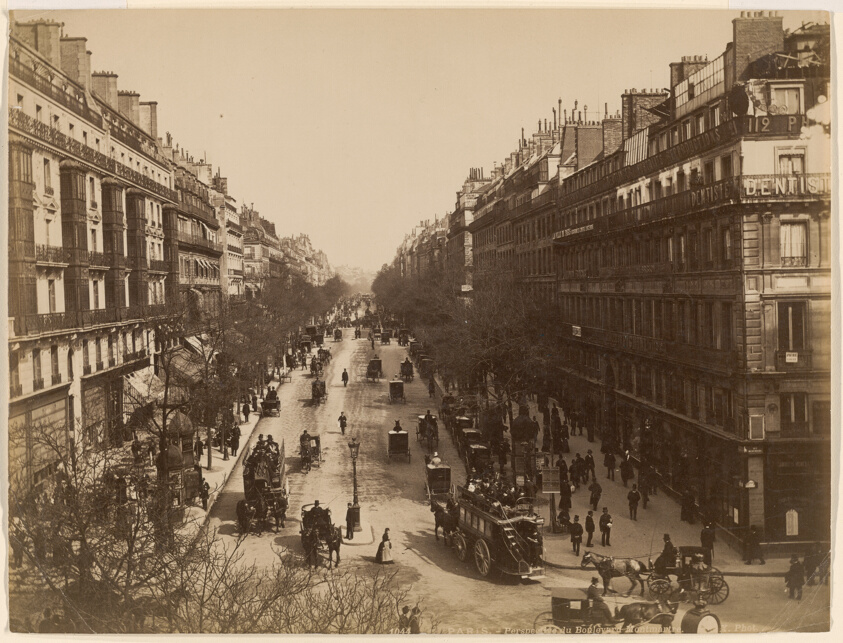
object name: Photograph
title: Montmartre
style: 19th century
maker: Artist unknown; European, active 19th century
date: 1870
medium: Albumen print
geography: Europe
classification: albumen silver print; photographic process; photography; photograph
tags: cityscapes, Paris